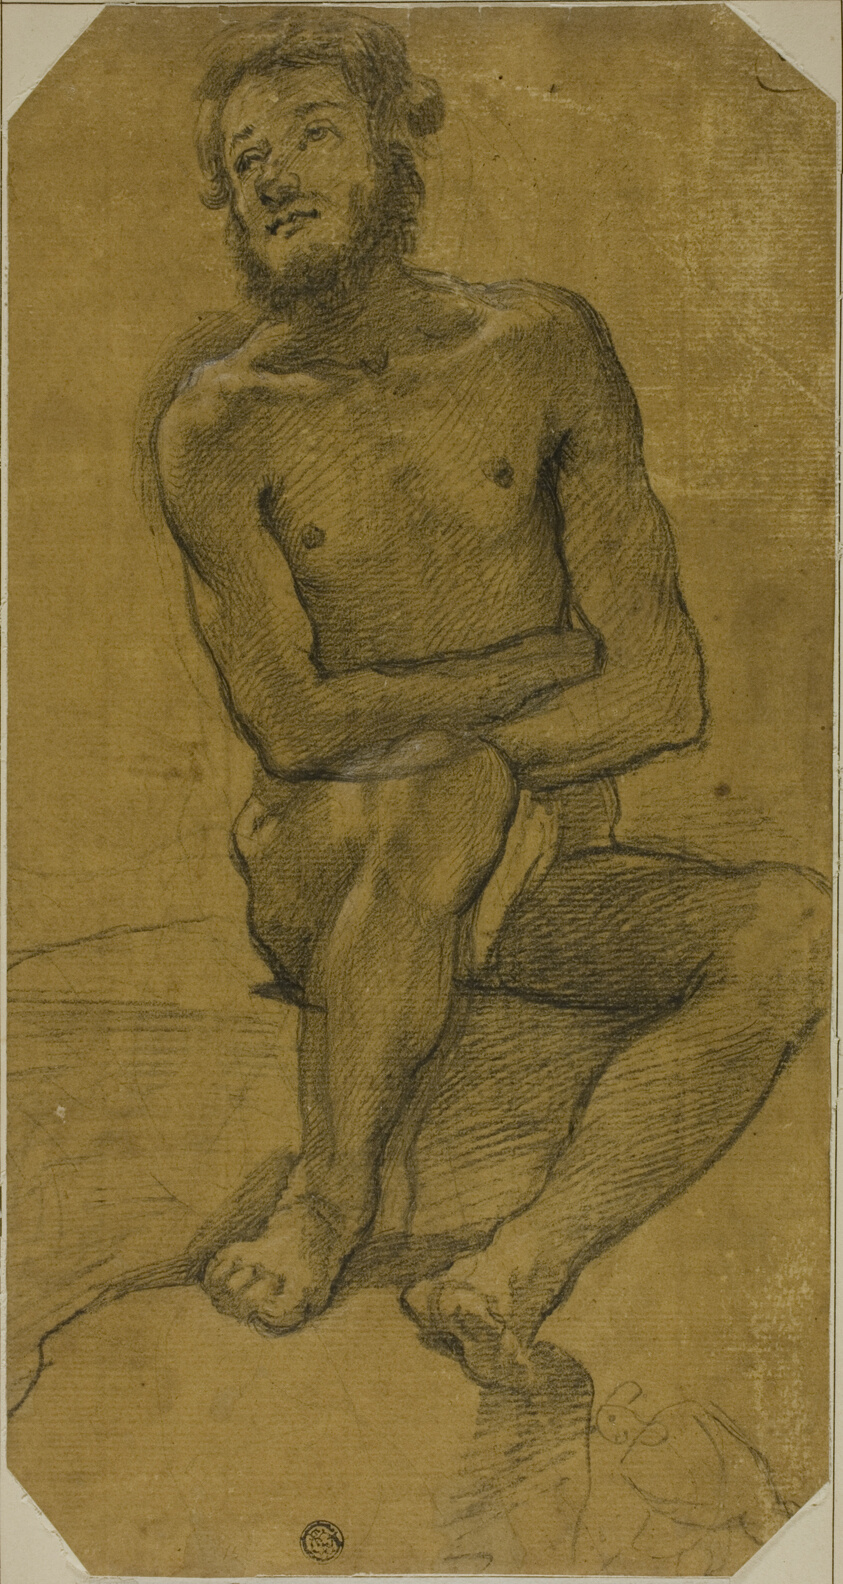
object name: Drawing and Watercolor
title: Seated Male Nude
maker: Follower of Jacopo Chimenti, called Jacopo da Empoli; Italian, 1551-1640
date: 1600/40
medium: Black chalk heightened with traces of white chalk, on cream laid paper prepared with ochre wash, laid down on cream wove paper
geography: Italy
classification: chalk; drawings (visual works); prints and drawing